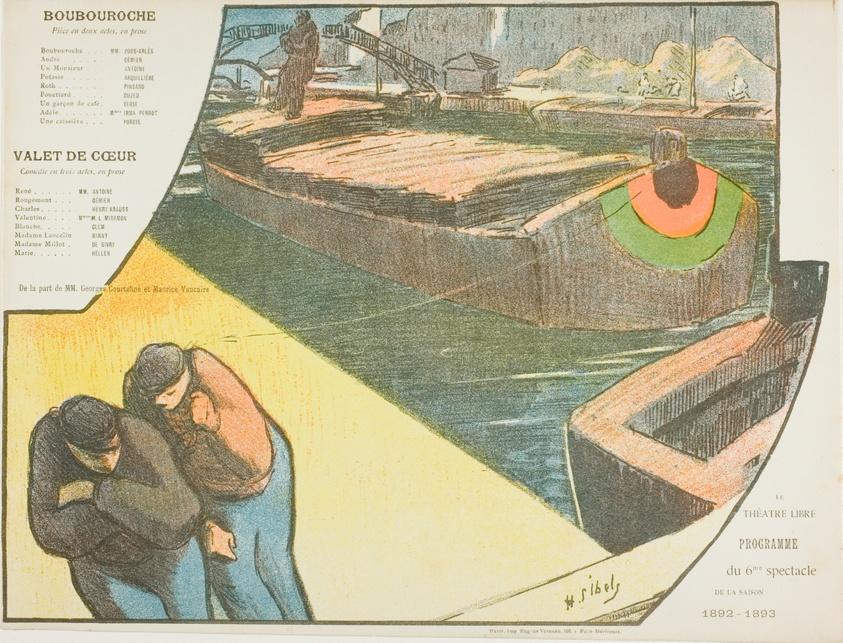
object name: Print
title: Sixth Performance: Boubourouche; Valet de Coeur, for Le Théatre Libre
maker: Henri-Gabriel Ibels (French, 1867-1936); printed by Imprimerie Eugène Verneau (French, 19th century-1906)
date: 1892–93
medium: Color lithograph on ivory wove paper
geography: France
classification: lithograph; print; prints and drawing